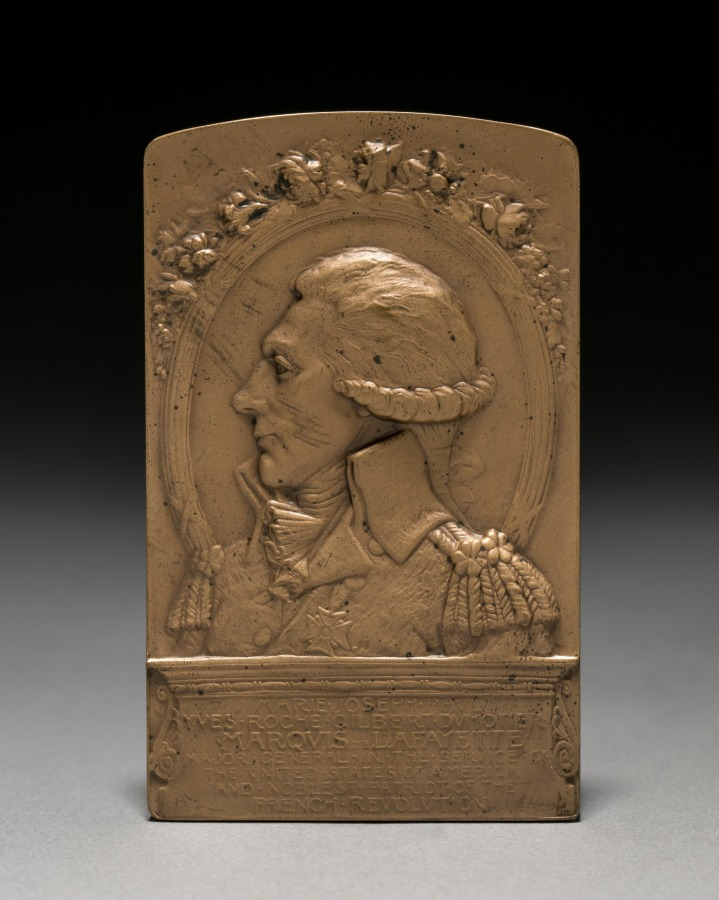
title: Medal: Lafayette (obverse)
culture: France, 20th century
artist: Jules Edouard Roiné (French, 1857–1916)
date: 1911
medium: bronze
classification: Metalwork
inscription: below: "MARIE JOSEPH PAUL/ YVES. ROCHE. GILBERT. DVMOTIER/ MARQVIS DE LAFAYETTE/ MAJOR GENERAL IN THE SERVICE OF/ THE VNITED STATES OF AMERICA/ AND NOBLEST PATRIOT OF THE/ FRENCH REVOLVTION."